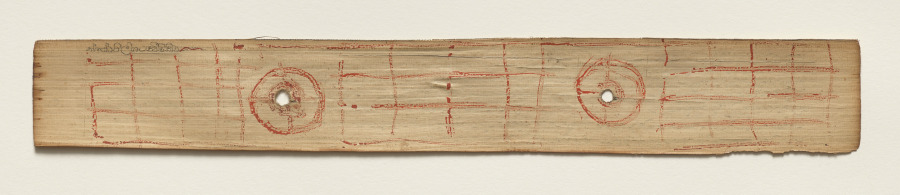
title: Leaf from a Buddhist Manuscript (verso)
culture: Sri Lanka, Singhalese, Late 17th century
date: c. 1700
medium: fiber paper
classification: Manuscript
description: Palm leaf material is still used for manuscripts in Sri Lanka. The palm leaves are prepared first by boiling them, drying them in the sun, and then rubbing them with oils. Scribes then use a metal stylus to incise the text. Then charcoal powder is wiped across the pages, filling in only the inscribed lines.